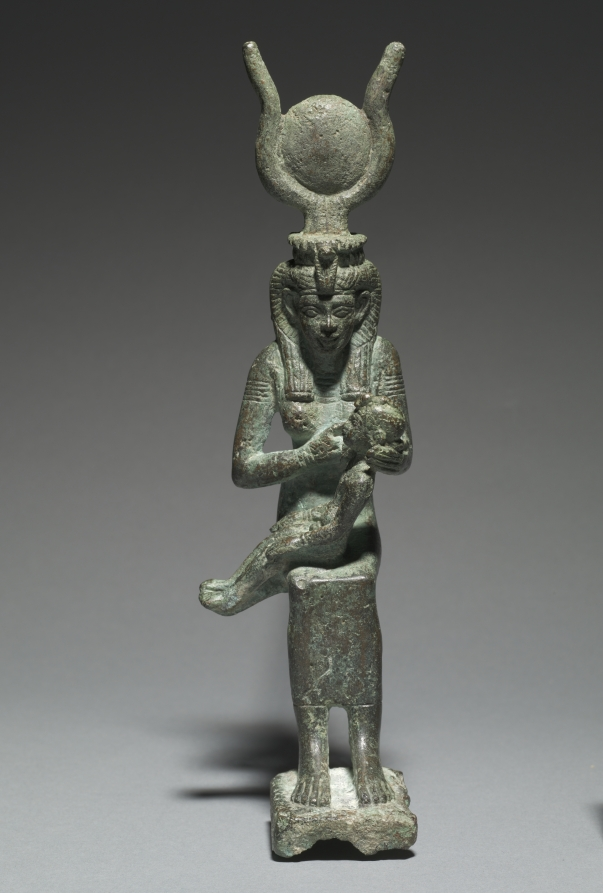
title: Statuette of Isis and Horus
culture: Egypt, Late period (715–332 BCE), Dynasty 26 or later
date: 664–30 BCE OR 664–330 BCE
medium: bronze, solid cast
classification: Sculpture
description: This statuette of Isis and Horus is a better than average example of an extremely common type. Isis offers her breast to her son Horus, who is seated on her lap. With her left hand she cradles the young god, while with her right she clasps her left breast. She wears a striated divine wig, vulture headdress, and uraeus, the details of which are finely incised. Above her are the modius, cow's horns, and a sun disk. Horus sits at a right angle to his mother, his arms at his side. He wears the sidelock of youth and a uraeus. He is nude except for a broad collar and a chain from which is suspended a heart amulet.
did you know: Originally, the goddess would have been provided with a wooden throne.